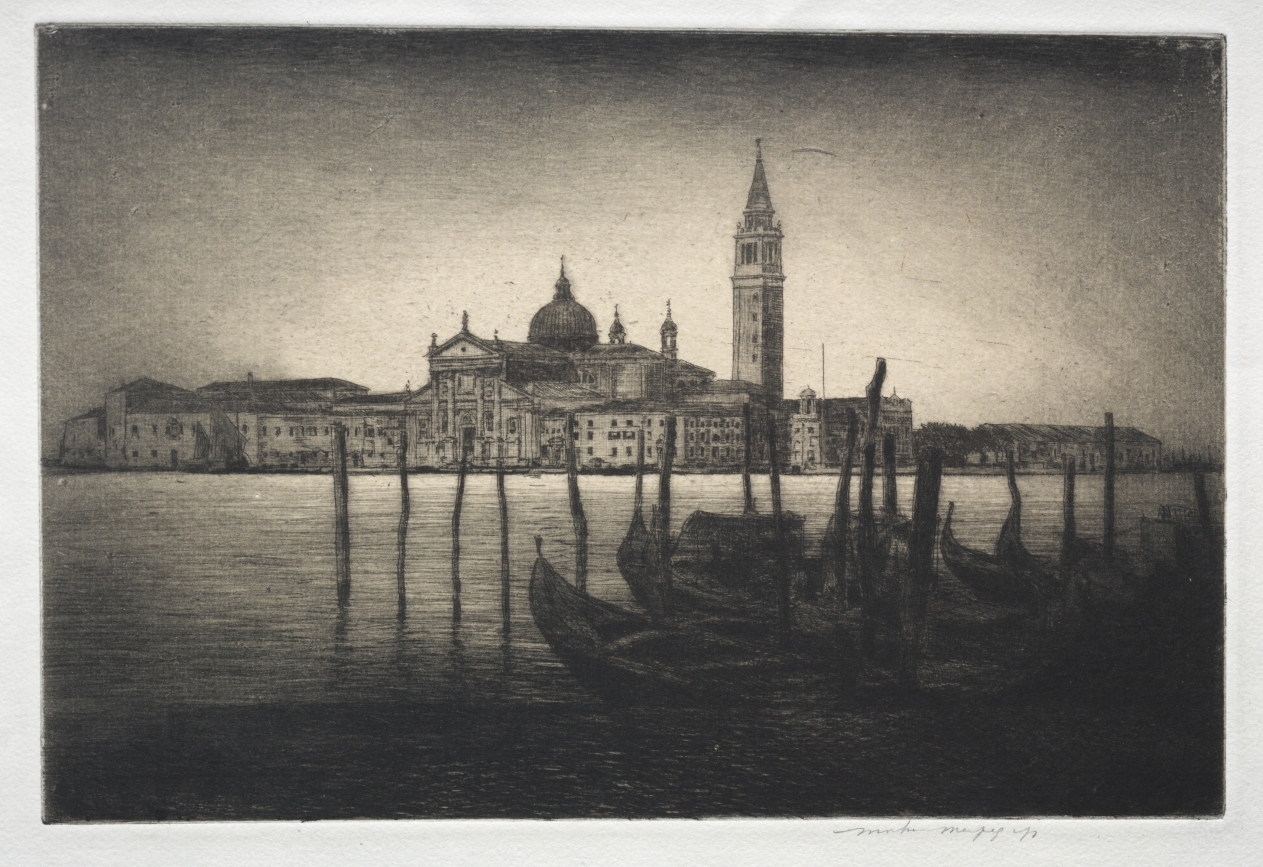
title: San Giorgio Maggiore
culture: England, 19th century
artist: Mortimer Menpes (British, 1860–1938)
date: 1910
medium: etching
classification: Print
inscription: titled, lower left, in graphite; lower left, in graphite: "152"